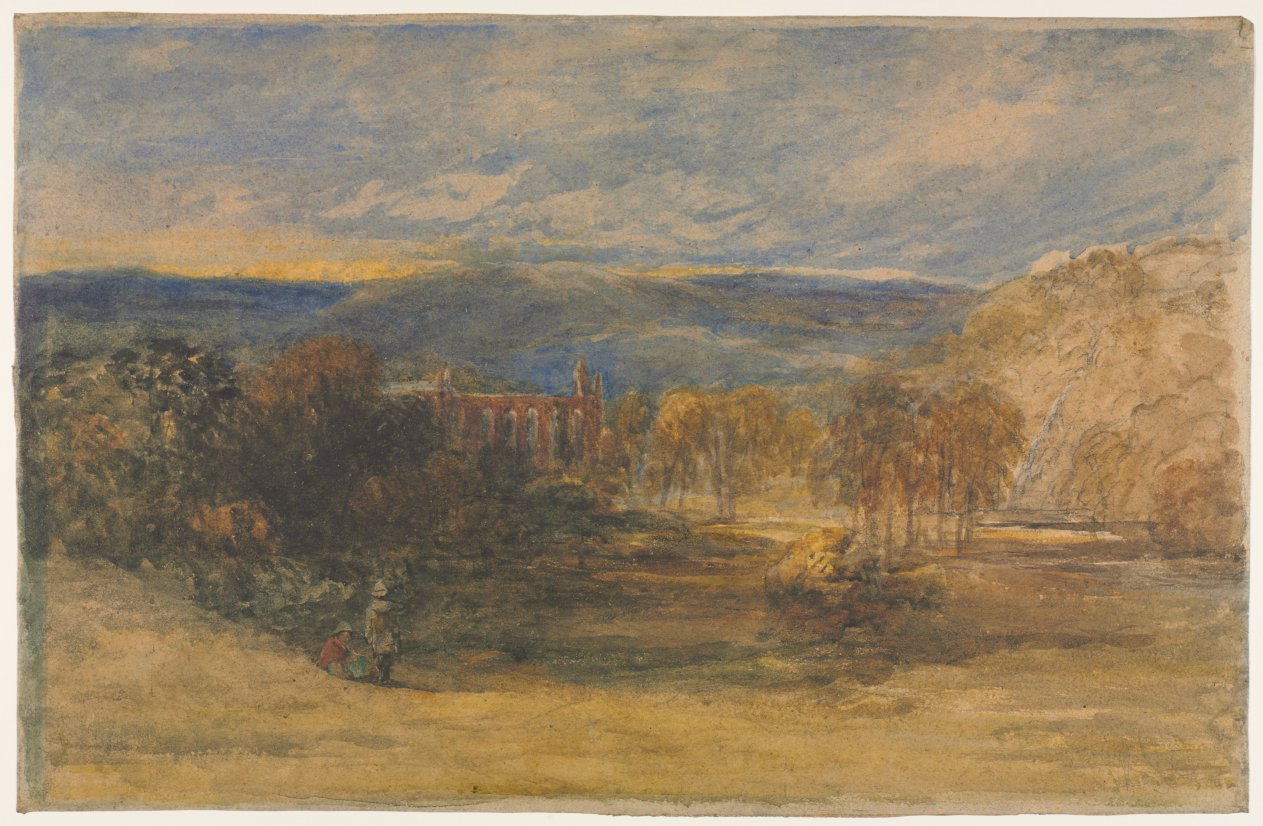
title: Bolton Abbey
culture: England, 19th century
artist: David Cox (British, 1783–1859)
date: c. late 1840s-1857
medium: watercolor with black chalk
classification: Drawing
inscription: inscribed, at lower right, in graphite: WSE; in white chalk on wood backing: June 8-03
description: This moody, broadly painted watercolor on rough, brown paper is emblematic of David Cox’s late style. Velvety grays and greens throughout the composition shift almost imperceptibly and streaks of blue wash, describing the distant hills and sky, are pierced by a sliver of brilliant yellow at the horizon. The ruined 12th-century priory is relegated to the background, nearly lost in the twilight.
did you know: The neighborhood where Bolton Abbey was found was one of David Cox's favorite places to paint and the church appeared as a subject throughout his works from about 1828 through 1857.